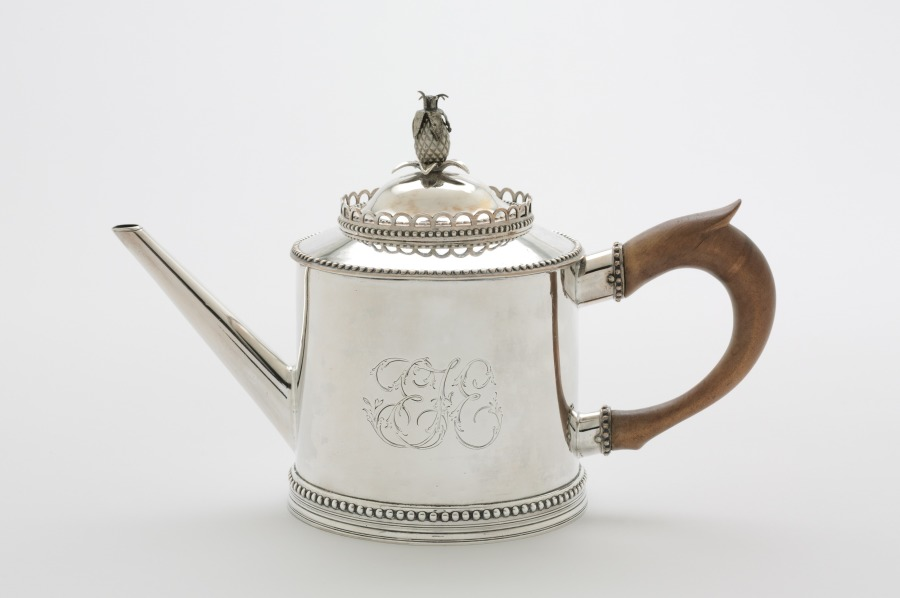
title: Teapot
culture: America, Pennsylvania, Philadelphia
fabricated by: John David (American, 1736–1793)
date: c. 1790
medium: silver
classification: Silver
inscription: engraved: "EFE" in script .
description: This teapot may have belonged to Dr. Enoch F. Edwards, George Washington’s personal physician.